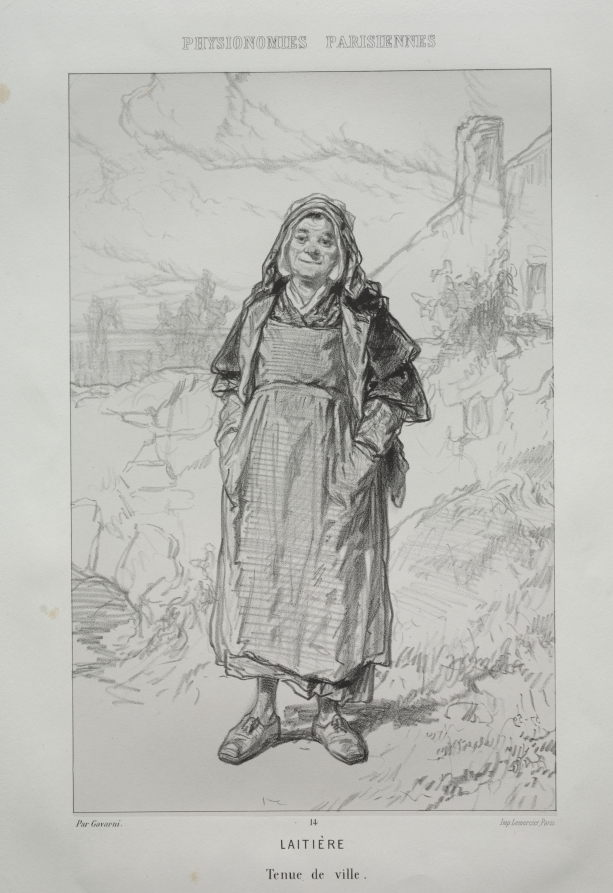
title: Laitière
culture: France, 19th century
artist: Paul Gavarni (French, 1804–1866)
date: c. 1857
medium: lithograph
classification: Print